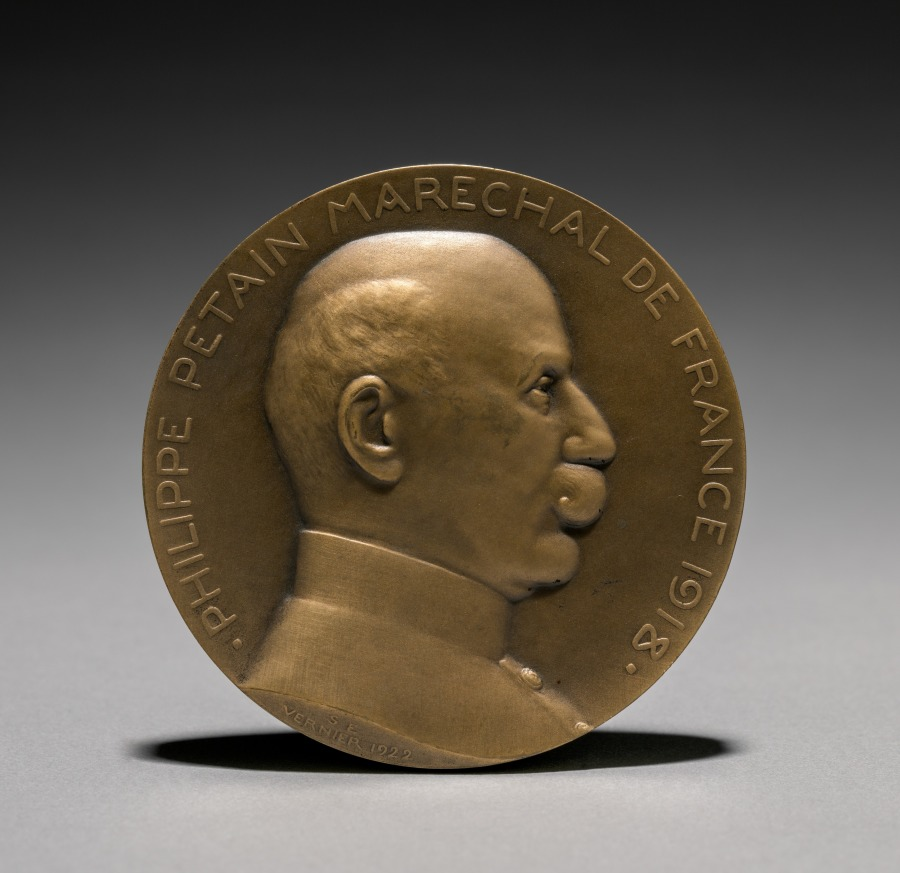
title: Petain Medal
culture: France, early 20th century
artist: Èmile Séraphin Vernier (French, 1852–1927)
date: 1922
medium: bronze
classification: Metalwork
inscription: obverse - "Philippe Petain Marechal de France, 1918." reverse - "AU MARECHAL PETAIN. ON LES AURA AVRIL 1916. ON LES A NOVEMBRE 1918."